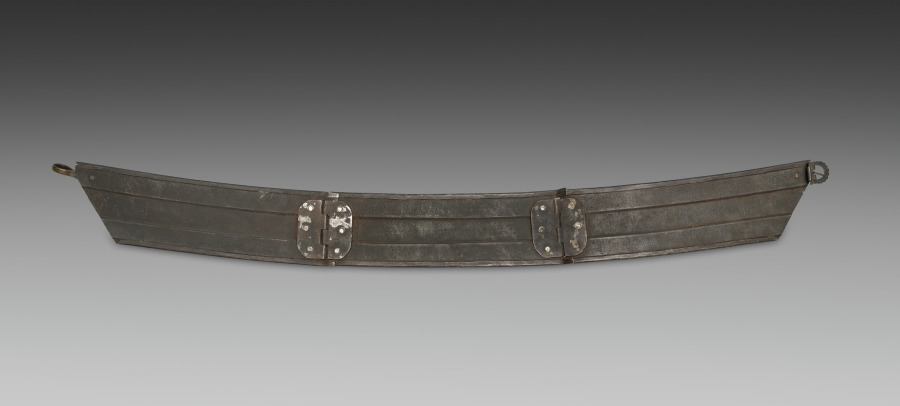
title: Armored Horse's Rein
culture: Germany, 19th century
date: 1801–1900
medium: steel with black paint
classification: Arms and Armor